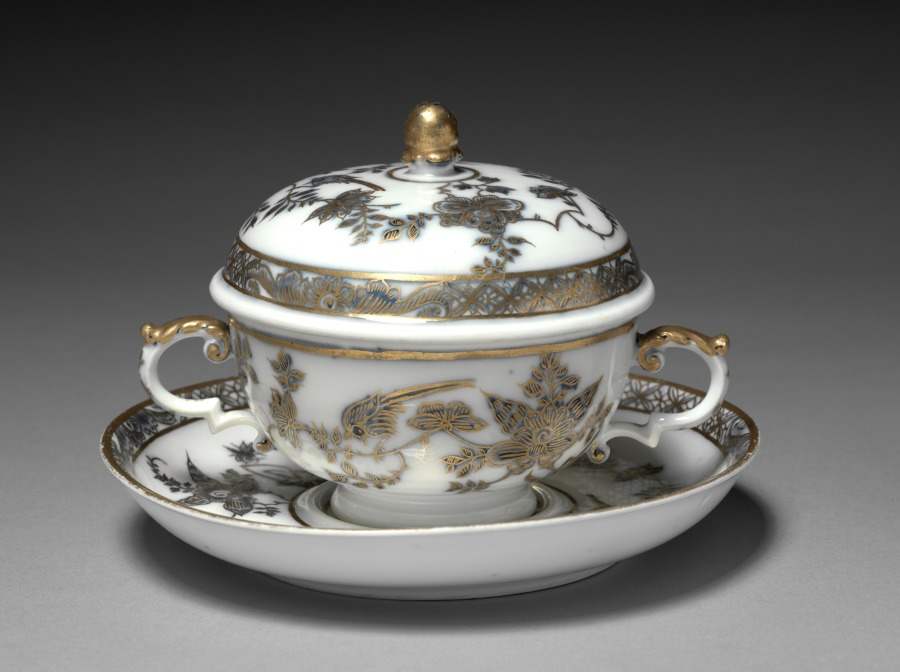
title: Covered Broth Bowl and Stand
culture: Germany, Meissen, 18th century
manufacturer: Meissen Porcelain Factory (German, est. c. 1710)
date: 1730–40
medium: gilt porcelain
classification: Ceramic